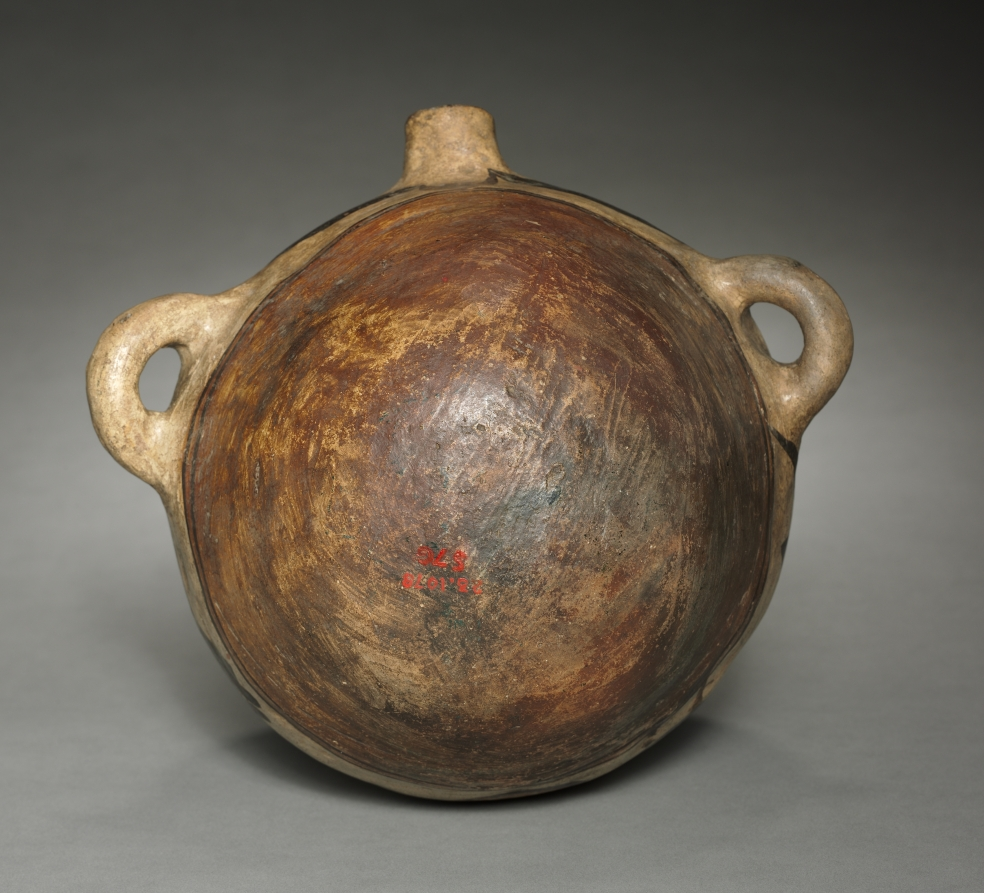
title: Canteen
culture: Native North America, Southwest, Arizona, Pueblo, Hopi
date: 1870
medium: ceramic, slip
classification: Ceramic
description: Since the 1500s, Hopi women made big-bellied canteens, based on Spanish prototypes, and used them to carry water. By the late 1800s, canteens became popular with Euro-American tourists, who increasingly flocked to the Southwest in search of encounters with “exotic” Native American cultures. Thus, Hopi artists embellished their wares to improve their appeal, here with graceful abstract forms.